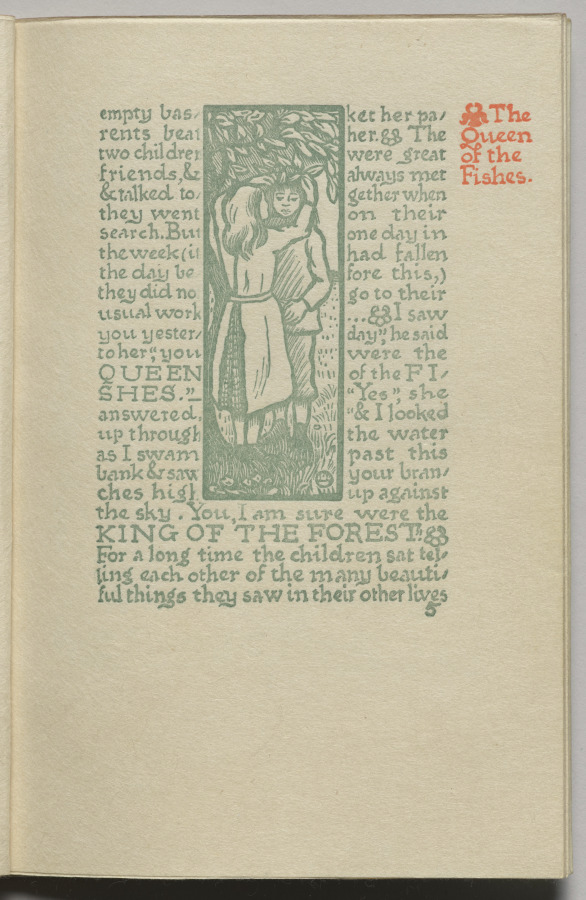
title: The Queen of the Fishes: Plate 5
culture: England, 19th century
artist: Lucien Pissarro (British, 1863–1944)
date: 1894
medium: woodcut printed in gray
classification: Bound Volume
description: Pissarro, son of the French Impressionist artist Camille Pissarro, moved to England in 1890. By 1894 he and his wife, Esther Bensusan Pissarro, had bought a printing press and established the Eragny Press. Influenced by William Morris, they were involved in every step of the production process: designing, cutting the woodblocks, setting type, and printing. The first book published by Ergany Press, The Queen of the Fishes, is based on an old fairy tale in which a peasant boy and girl escape the hardships of their lives by fantasizing that they have been turned into a giant oak and a splendid fish, respectively.